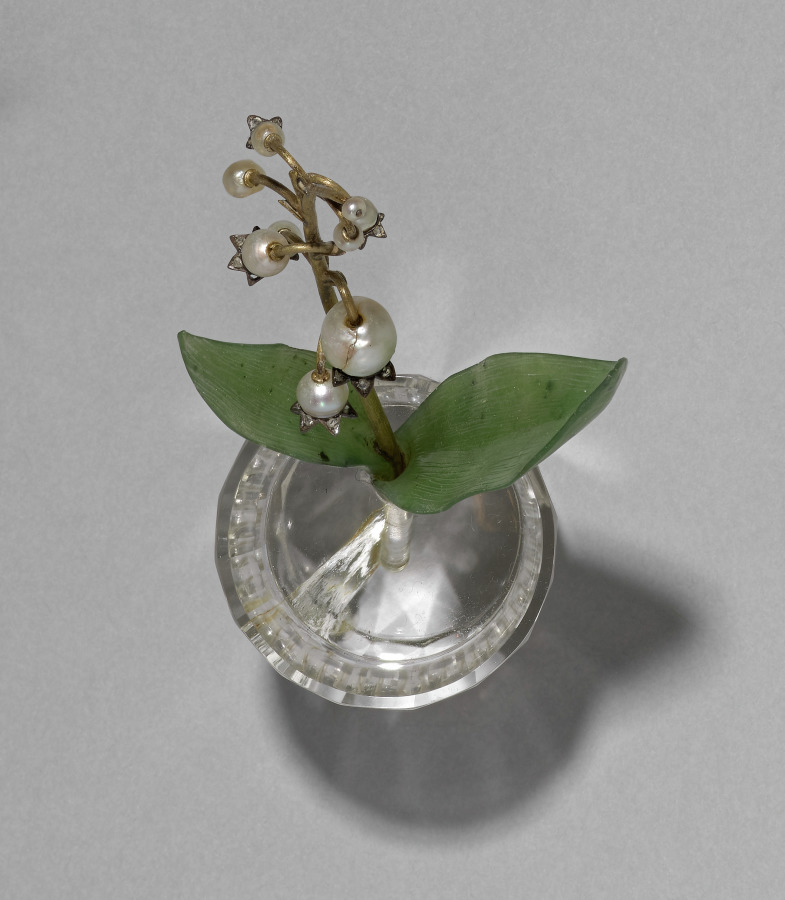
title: Flower Study of a Lily of the Valley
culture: Russia, St. Petersburg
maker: House of Fabergé (Russian, 1842–1918)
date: c. 1885–1915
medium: pearls, diamonds, jade, rock crystal, silver, gold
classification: Miscellaneous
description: This flower study resembles a stem of lily-of-the-valley. Fabergé’s inspiration for his flower studies is said to have come from the floral brooches of precious stones that were made in the 1700s for Catherine the Great as well as from the Japanese art of flower arranging, known as ikebana. Small and delicate, Fabergé’s flower studies were given as intimate gifts to friends by the tsarina and others in the court. She also liked to take them around to wherever the imperial family was residing as a reminder of spring during the harsh Russian winters.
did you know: The stems of Fabergé’s flower studies are set into little basins carved from rock crystal to resemble pots of water.